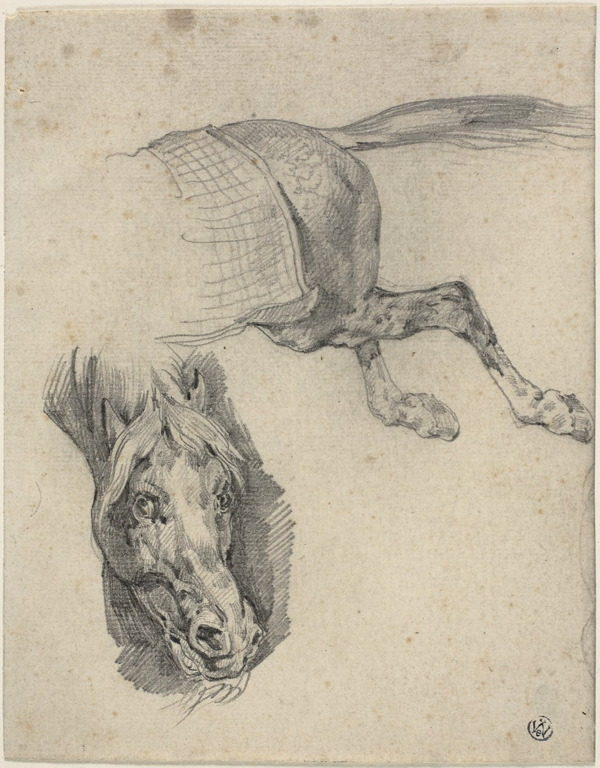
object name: Drawing and Watercolor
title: Head and Hindquarters of a Racing Horse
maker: Jean Louis André Théodore Géricault, after; French, 1791-1824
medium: Graphite on ivory laid paper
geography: France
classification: graphite; drawings (visual works); prints and drawing